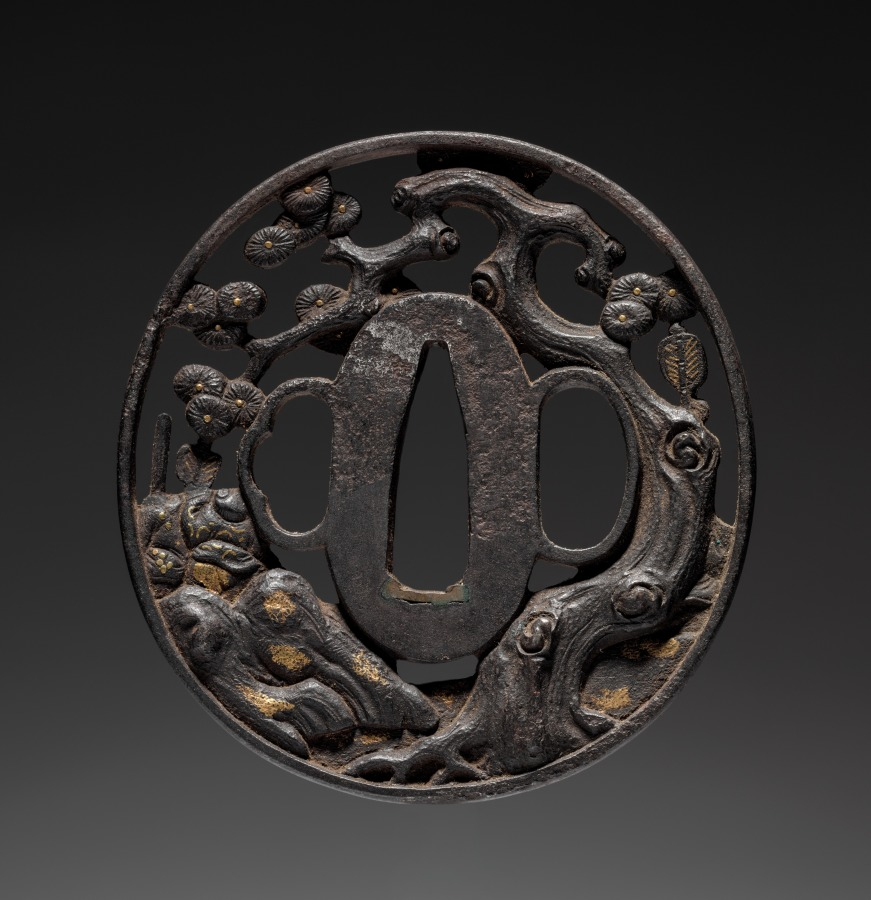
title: Sword Guard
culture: Japan, Edo period (1615–1868)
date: late 1700s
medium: iron with gold and copper inlay (Tetsugendo type)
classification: Arms and Armor